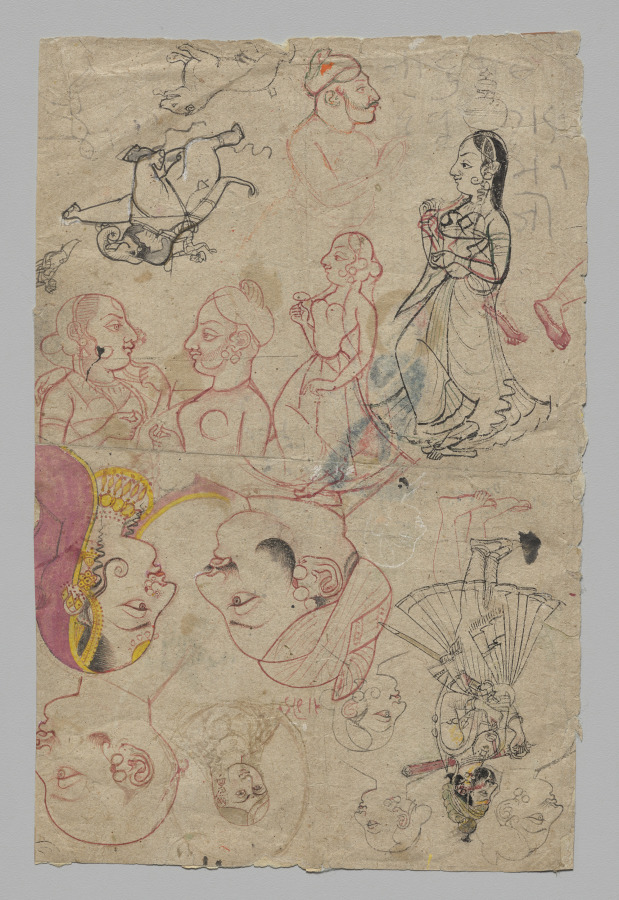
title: Page of Sketches with a Portrait of Sri Maharaj Chatter Singhji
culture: India, Rajasthan, Kota, 19th century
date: c. 1866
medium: Gum tempera and ink on paper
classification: Drawing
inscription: on verso: Shri Maharaji Chatter Singhji